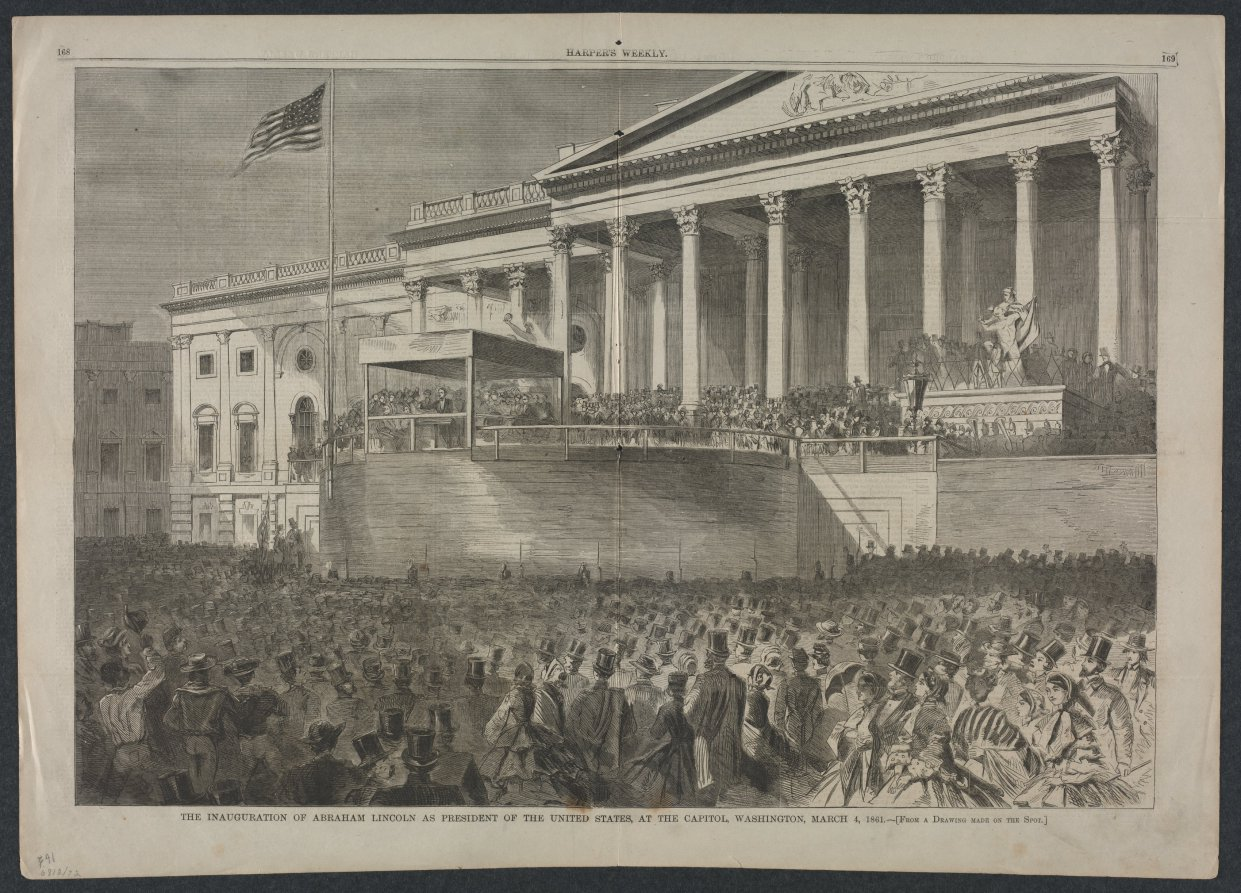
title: The Inauguration of Abraham Lincoln as President of the United States, at the Capitol, Washington, March 4, 1861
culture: America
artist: Winslow Homer (American, 1836–1910)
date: 1861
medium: wood engraving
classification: Print